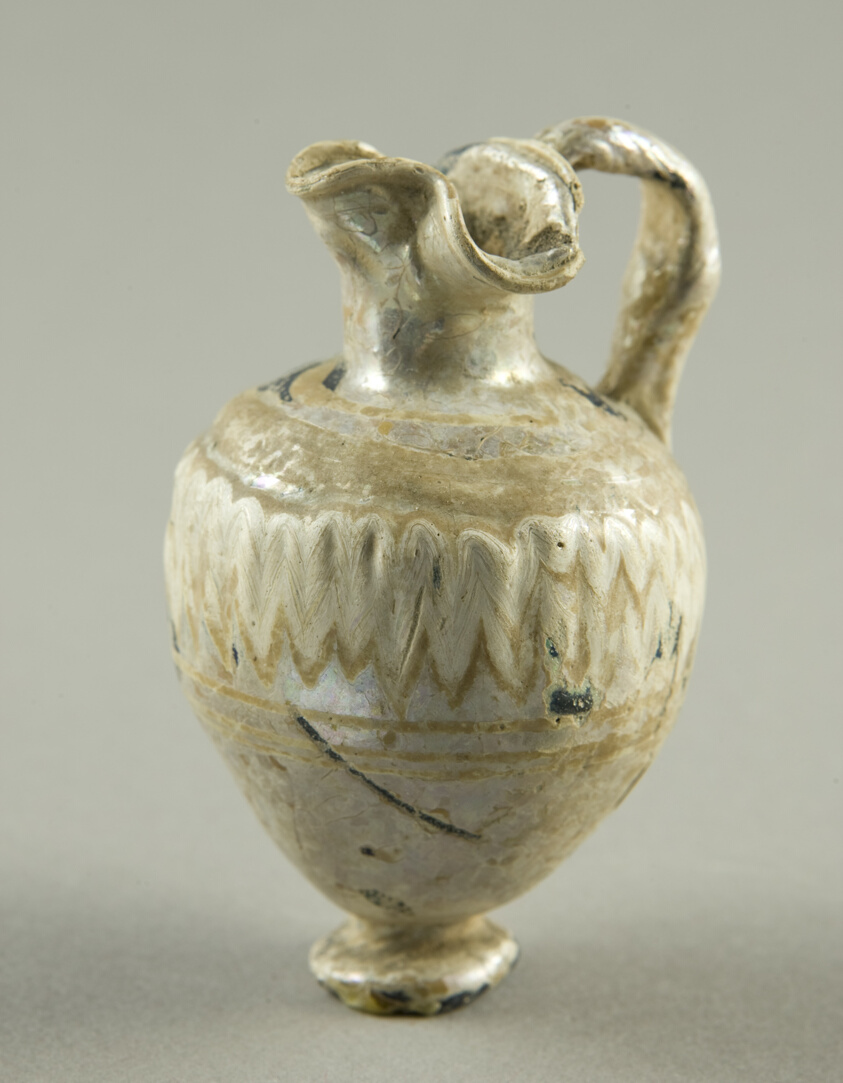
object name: Vessel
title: Pitcher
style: late period (egyptian)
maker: Eastern Mediterranean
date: about 5th century BCE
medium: Glass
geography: Egypt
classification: glass; vessel; ancient art